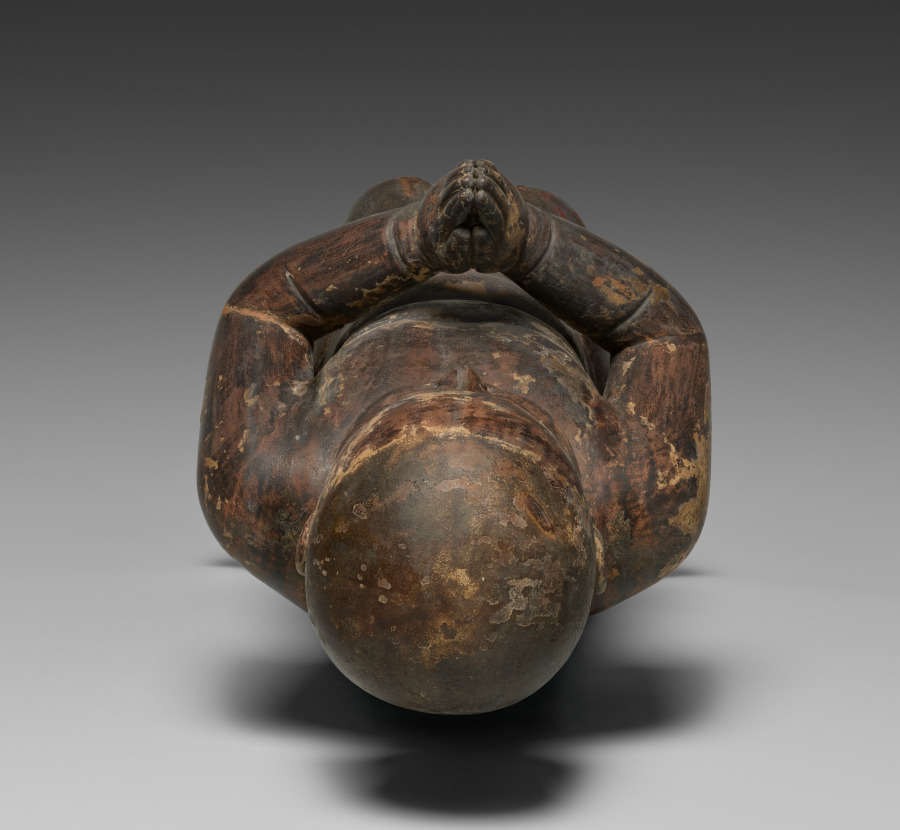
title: Prince Shōtoku at Age Two (Shōtoku Taishi)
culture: Japan, Kamakura period (1185–1333)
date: early 1300s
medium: Wood with lacquer, color, and rock-crystal inlaid eyes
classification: Sculpture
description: Two-year old Prince Shōtoku (573?–622?) places his palms together in a gesture called gasshō. Shōtoku played a major role in the introduction of Buddhism to Japan, and devotees of the prince commissioned painted and sculpted images commemorating important moments of his life. At age two, the prince faced east and chanted the name of the Buddha without having been taught the practice. This sculpture captures the fantastic event foreshadowing his future acts.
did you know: Shōtoku Taishi had several titles. One translates to "the prince of the stable door" because he was said to have been born in the imperial stables.